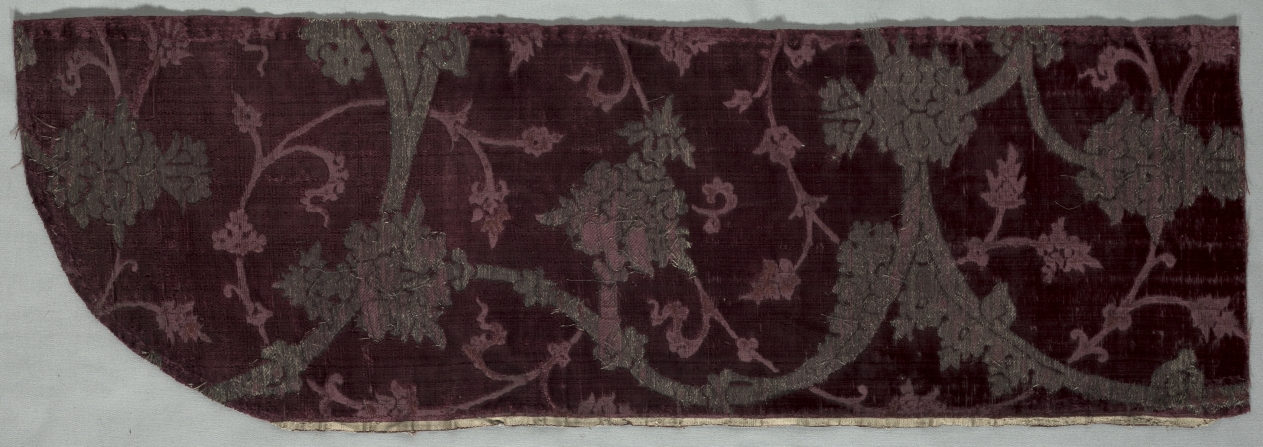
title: Velvet Fragment (of a Chasuble ?)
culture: Italy, 15th century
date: 1400s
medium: velvet (cut, voided, and brocaded): silk and gold thread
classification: Velvet